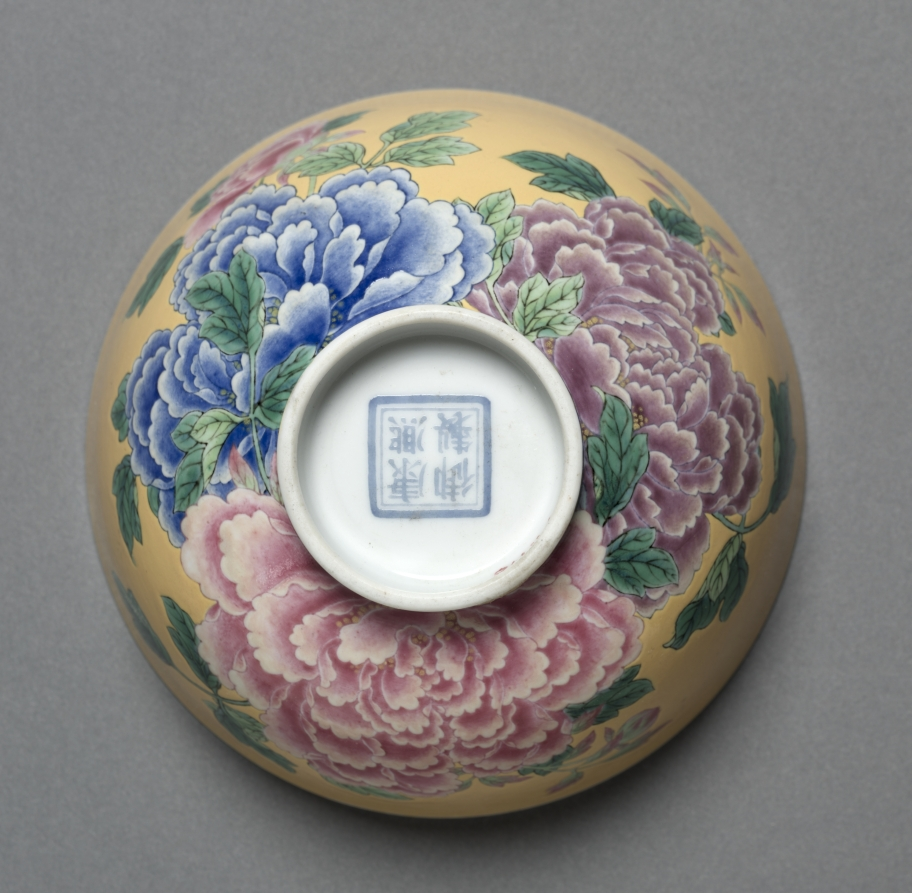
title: Bowl with Peonies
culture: China, Jiangxi province, Jingdezhen kilns, Qing dynasty (1644-1911), Kangxi mark and reign (1661-1722)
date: 1662–1722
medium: porcelain with foreign color (yangcai) overglaze enamel decoration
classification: Ceramic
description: This bowl was made at the Jingdezhen kilns and then decorated probably in the Imperial Palace workshops in Beijing.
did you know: In East Asian art, peonies traditionally symbolize prosperity and wealth.